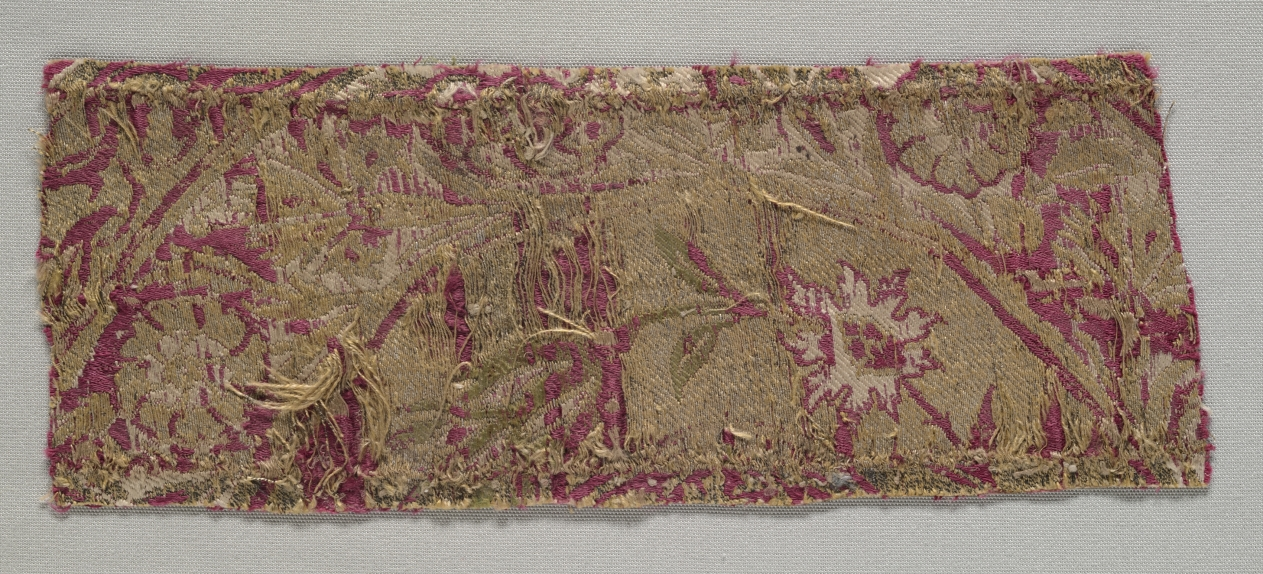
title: Textile Fragment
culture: Turkey, Bursa, 16th century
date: 16th century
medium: brocaded silk with metal thread weft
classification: Textile